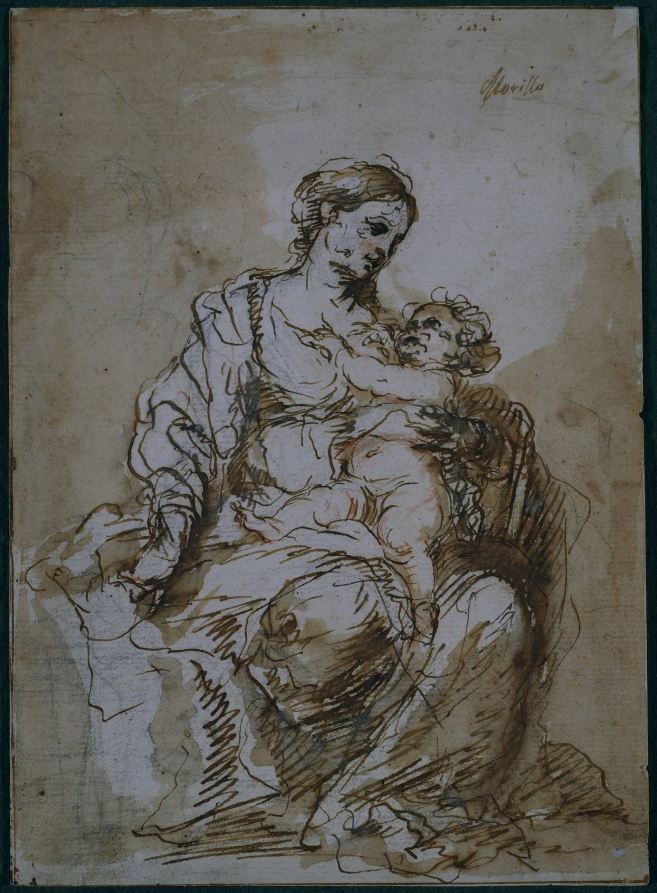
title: Madonna Nursing the Christ Child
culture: Spain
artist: Bartolomé Esteban Murillo (Spanish, 1617–1682)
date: c. 1670–72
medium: pen and brown ink and brush and brown wash over red and black chalk, with traces of white; framing lines in pen and brown ink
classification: Drawing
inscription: in brown ink, upper right: Morillo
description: One of the finest of the rare drawings by Murillo, this sheet is a study for Virgin and Child, commissioned for the family chapel of the Marques de Santiago in Madrid and now at the Metropolitan Museum of Art, New York. Prized today for their dynamism, Murillo’s drawings served the practical purpose of working out the positions of the figures. Here, the artist suggested the tender bond between mother and child with the poignant connection of their gazes. His animated line and zigzag hatching create the feeling of incessant motion while the addition of ink wash creates deep shadows across the forms.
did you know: The inscription Morillo on this drawing is not the artist's signature but rather a notation likely made by a 17th-century owner of the drawing.